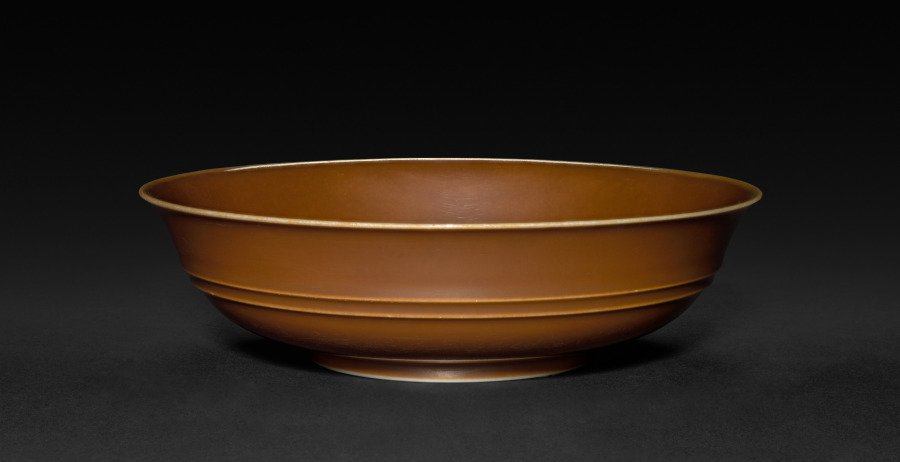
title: Dish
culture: China, Jiangxi province, Jingdezhen kilns, Qing dynasty (1644-1911), Yongzheng mark and reign (1723-35)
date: 1723–35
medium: porcelain with café-au-lait glaze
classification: Ceramic